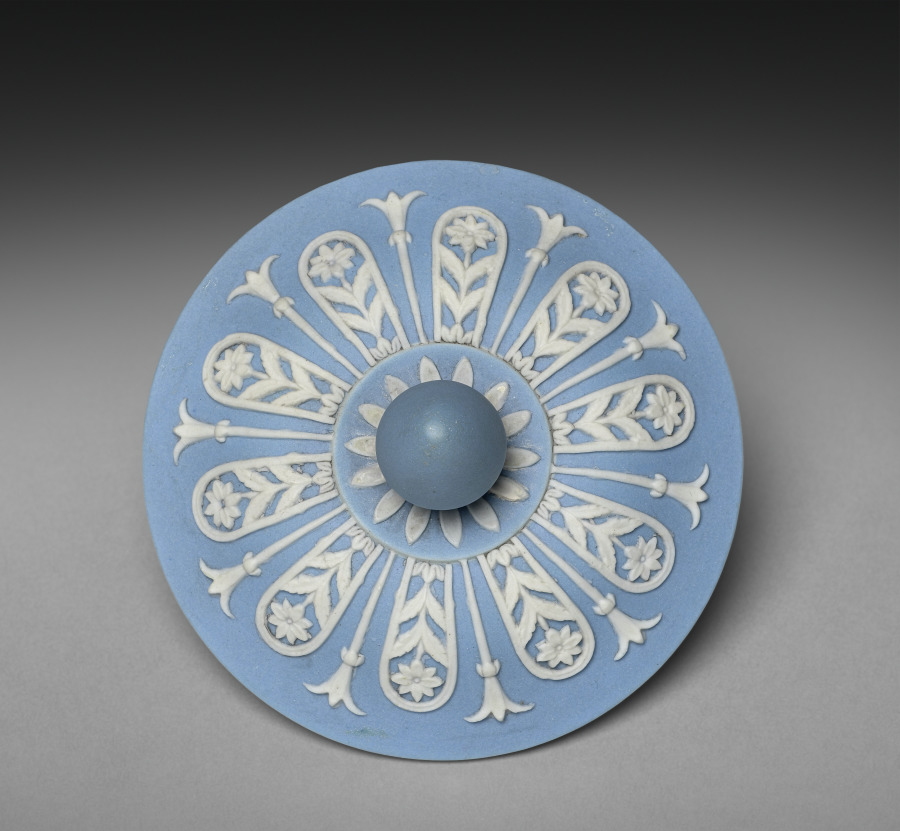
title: Cover for a Vase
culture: England, Staffordshire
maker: Josiah Wedgwood and Sons (British, Staffordshire, est. 1759)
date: c. 1850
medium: jasper ware with relief decoration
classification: Ceramic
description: Wedgwood's tricolor jasperware first became popular in the 1770s during a period of fascination with neoclassical decoration. This vase was probably made around 1850 during the period when this type of decoration was revived. The relief medallions depict two versions of the Greek god Apollo, the god of music, next to his harp or lyre.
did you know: See cover record.